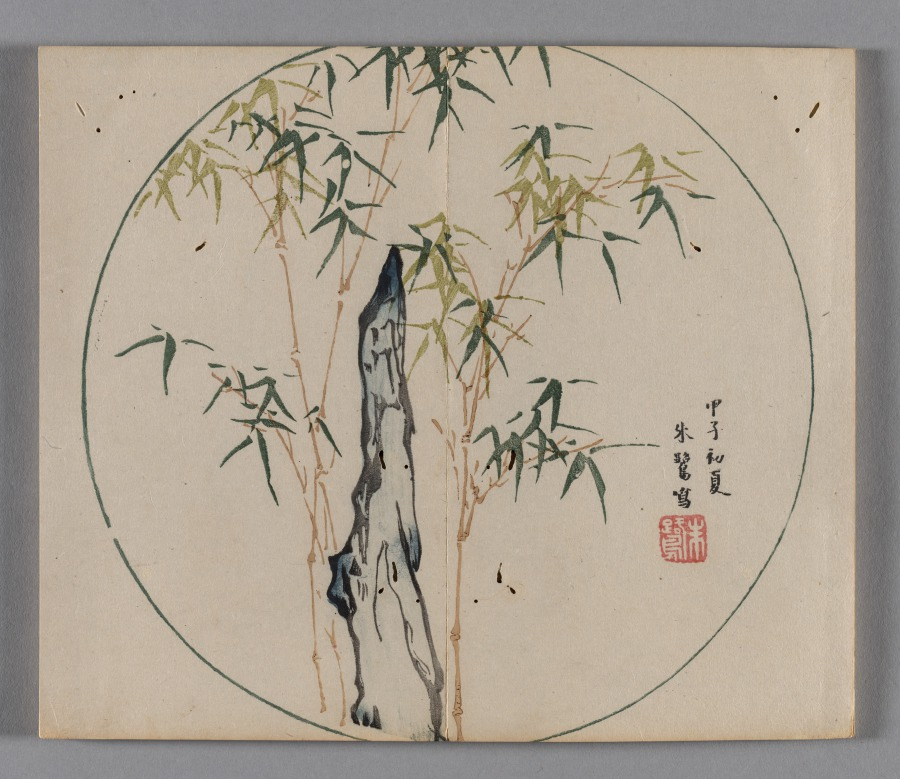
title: Ten Bamboo Studio Painting and Calligraphy Handbook (Shizhuzhai shuhua pu): Round Fans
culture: China, Qing dynasty (1644-1911)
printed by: Hu Zhengyan (Chinese, c. 1584–1674)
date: 1633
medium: Woodblock-printed book; ink and colors on paper; first edition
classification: Print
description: Color printing reached a level of perfection in the early 1600s, as seen in this Ten Bamboo Studio Collection of Calligraphy and Painting and the Mustard Seed Garden Manual of Painting (printed 1679 and 1701). The painterly quality, precision in registering (aligning) the woodblocks, and harmonious colors made them the most successful color print editions in Chinese history. Both editions were printed and compiled in Nanjing, spread nationwide, and had a great impact on the arts in Japan and Korea.